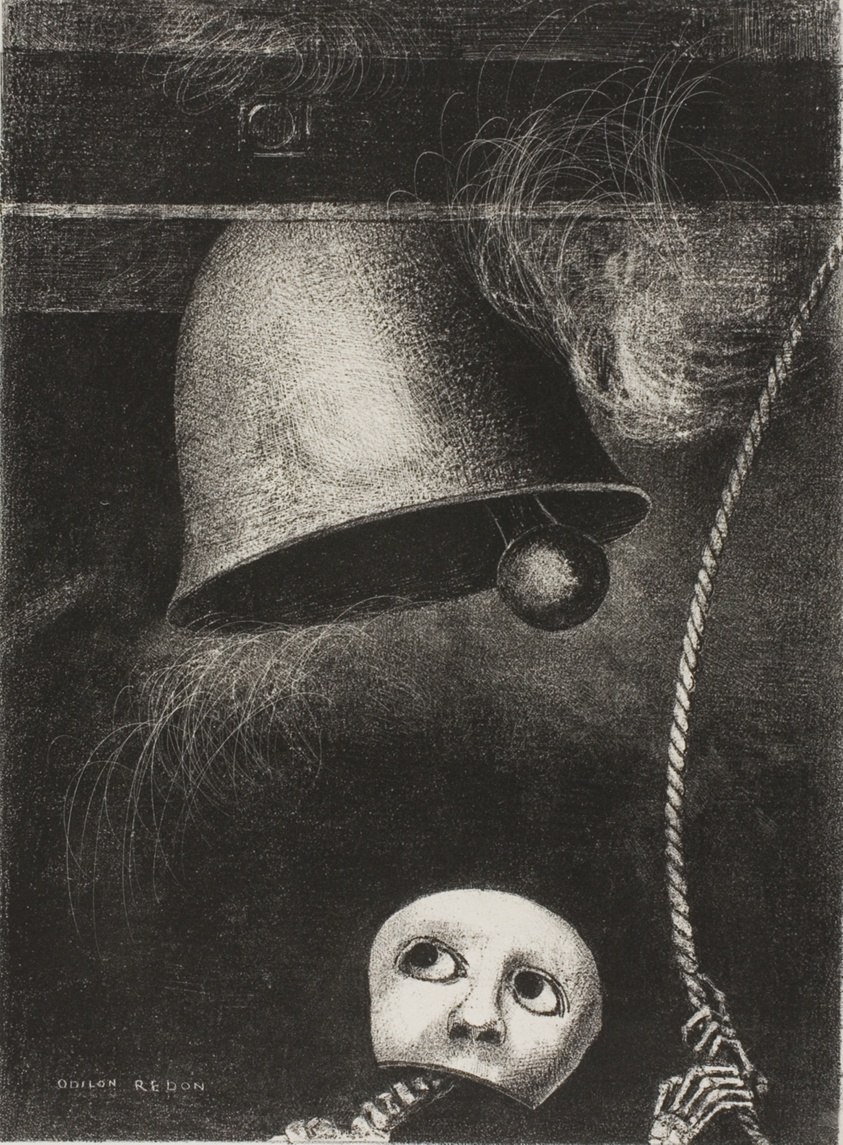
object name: Print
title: A Mask Sounds the Funeral Knell, plate three from To Edgar Poe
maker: Odilon Redon (French, 1840-1916)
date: 1882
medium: Lithograph in black on ivory China paper, laid down on white wove paper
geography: France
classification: lithograph; print; prints and drawing; paper